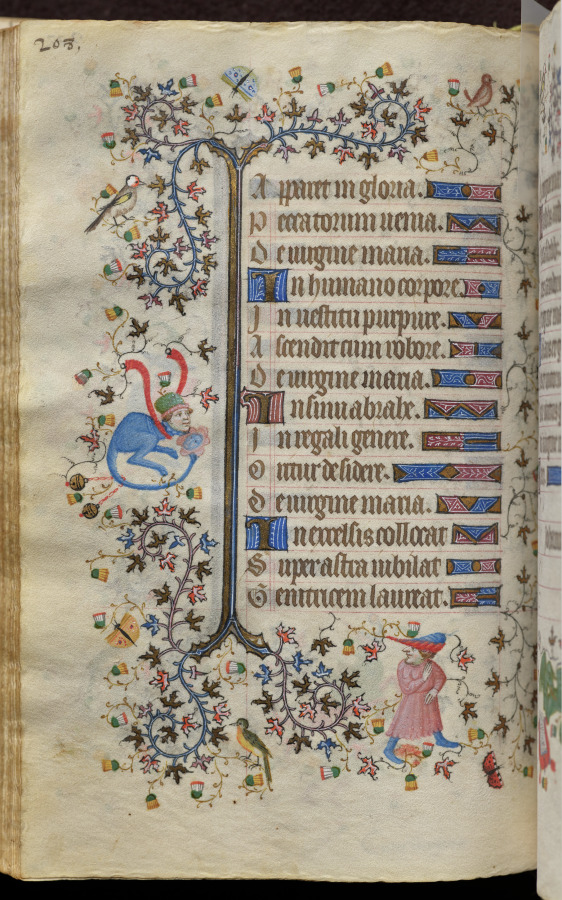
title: Hours of Charles the Noble, King of Navarre (1361-1425): fol. 104v, Text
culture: France, Paris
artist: Master of the Brussels Initials and Associates (French)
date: c. 1405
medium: ink, tempera, and gold on vellum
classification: Bound Volume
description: This precious volume was obviously highly prized by its owner, the French-born King of Navarre, who had his coat of arms painted on no less than twenty folios. Rather than directly commissioning this manuscript from a specific workshop, it seems that Charles the Noble acquired his book of hours -- perhaps ready-made for the luxury market -- while on a trip to Paris in 1404-05. A collaborative effort, six painting styles are evidenced within the pages of this codex, those of two Italians, two Frenchmen, and two Netherlanders. The painter who was responsible for the planning and decoration of the book, and who produced seventeen of the large miniatures, was a Bolognese artist known as the Master of the Brussels Initials. His principal assistant, responsible for most of the borders, was a Florentine who signed his name "Zecho" da Firenze on folio 208 verso.